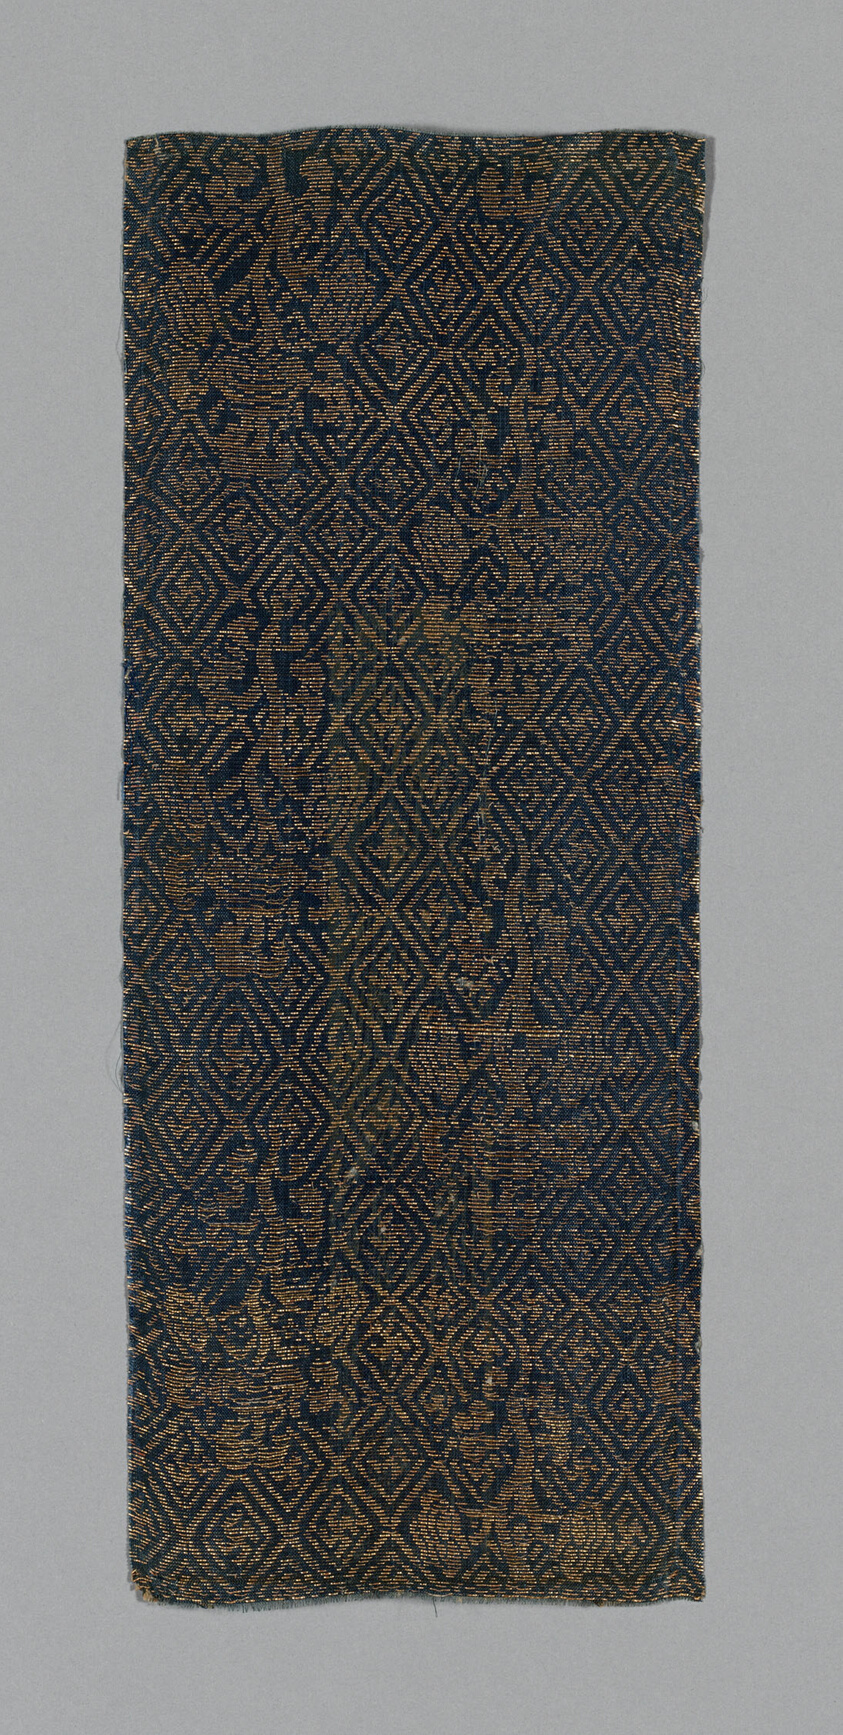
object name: Textile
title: Sutra Cover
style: ming, Chinese (culture or style), East Asian, asian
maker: China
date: Ming dynasty (1368–1644), c. 1590s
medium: Silk and gold-leaf-over-lacquered-paper strips, plain weave with supplementary patterning wefts bound in weft-float faced 1:2 'Z' twill interlacings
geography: China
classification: textile; weaving